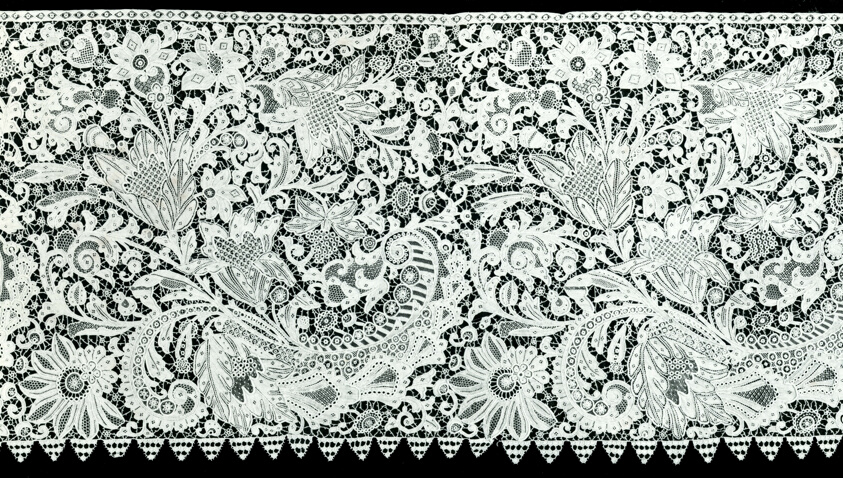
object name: Textile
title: Flounce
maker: Possibly made by Auguste Lefébure (French, born 1864); France, Bayeux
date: 1875/1900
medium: Cotton, needle lace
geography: Bayeux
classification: textile; lace - needle